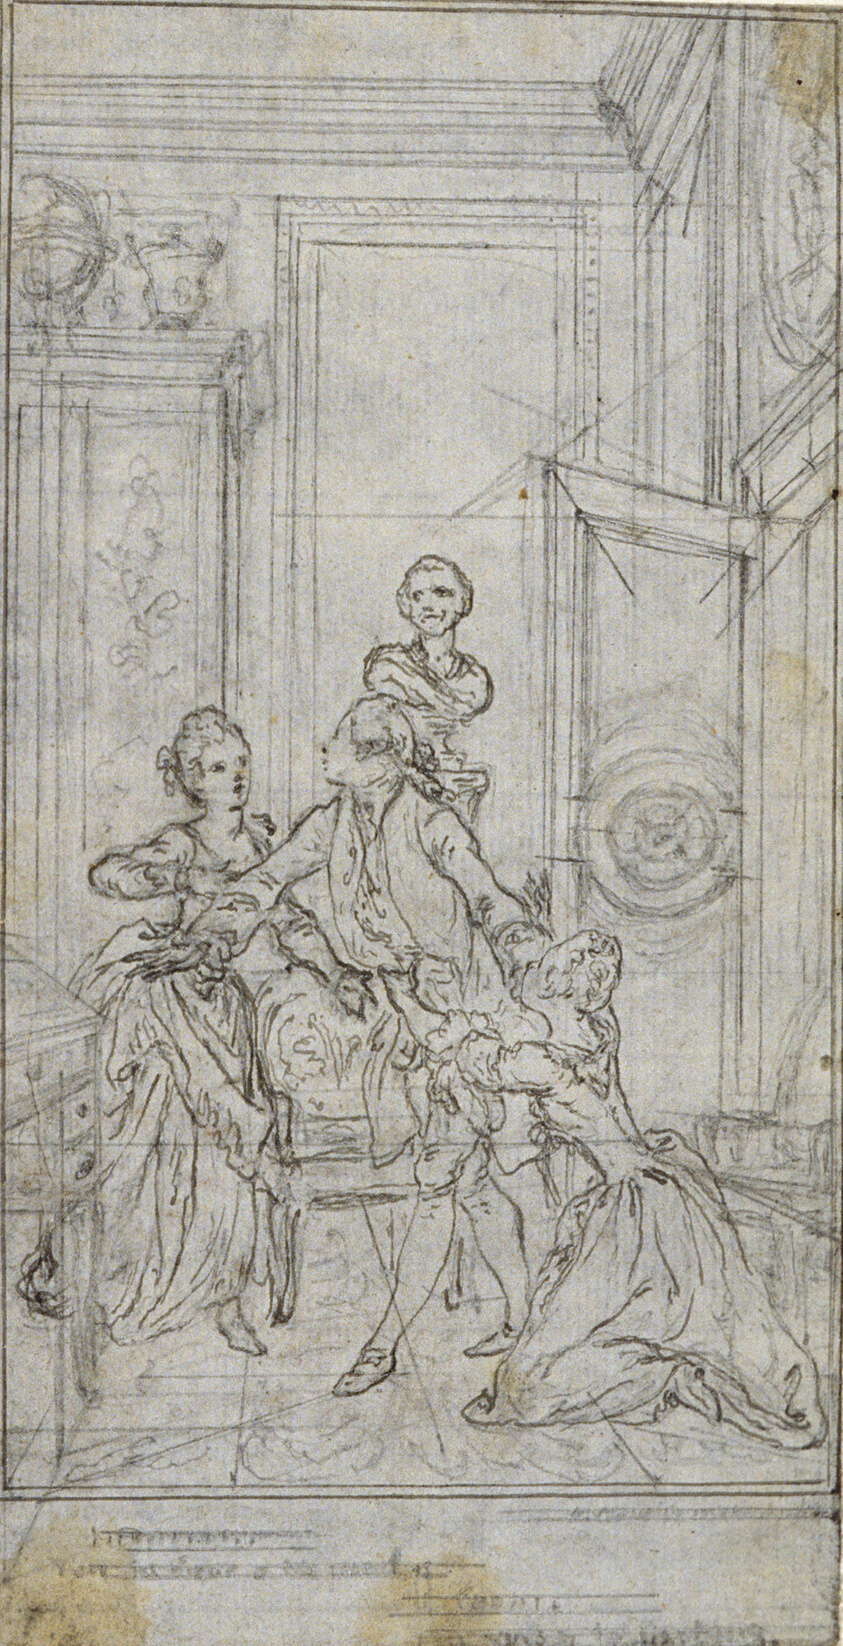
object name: Drawing and Watercolor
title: Study for Vignette-Frontispiece in Charles-Simon Favart's "L'Amitié à l'Epreuve"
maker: Hubert François Gravelot (French, 1699-1773)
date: c. 1771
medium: Graphite, on gray laid paper, laid down on ivory laid paper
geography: France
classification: graphite; drawings (visual works); prints and drawing